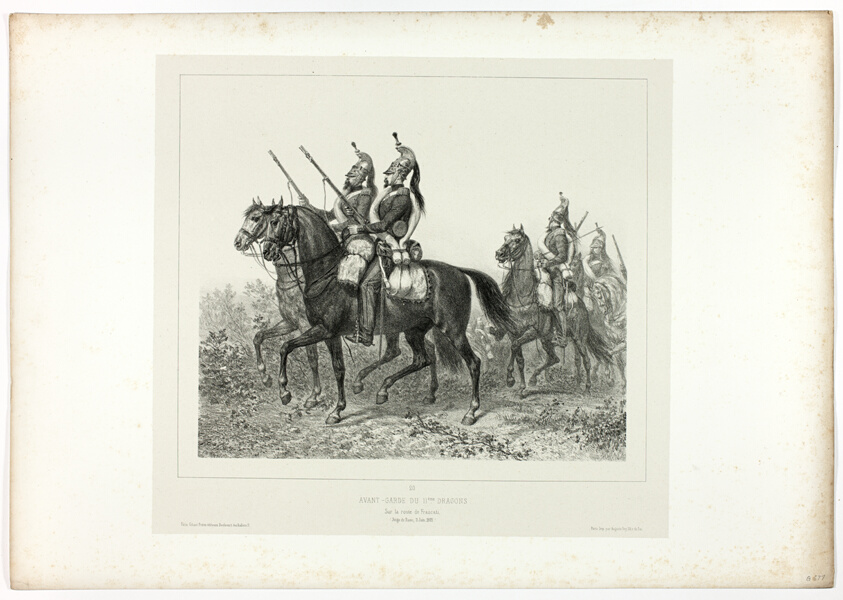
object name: Print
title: 11th dragoons advance guard, from Souvenirs d’Italie: Expédition de Rome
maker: Denis Auguste Marie Raffet (French, 1804-1860); printed by Auguste Bry (French, 19th century); published by Chez Gihaut Frères (French, 19th century)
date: 1854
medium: Lithograph in black on warm ivory wove chine laid down on off-white wove paper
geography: France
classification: lithograph; print; prints and drawing